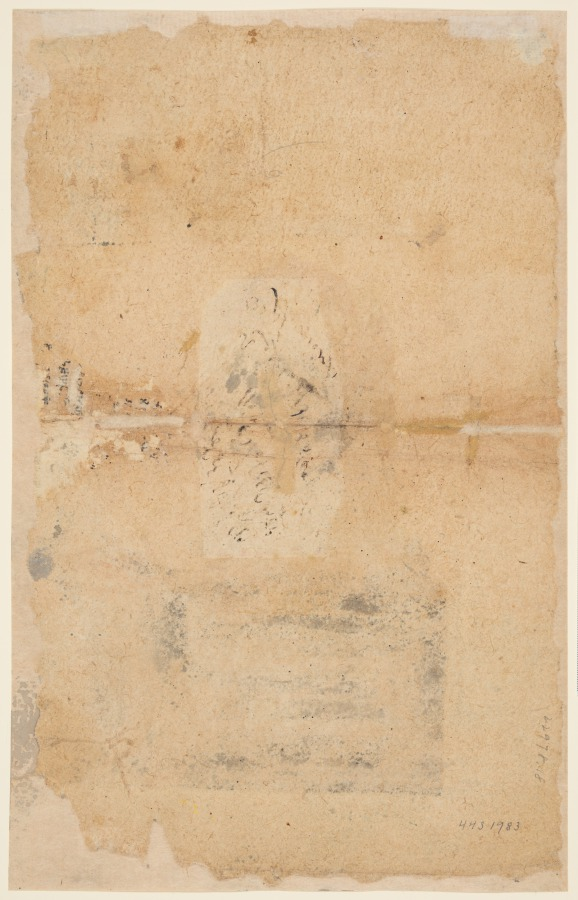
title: Stone sculptures in a Shiva temple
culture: Northern India, Pahari kingdoms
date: c. 1710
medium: gum tempera and ink on paper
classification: Painting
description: Viewers see a temple sanctum, the innermost and holiest part of a temple, from the point of view of the artist standing in front of the doorway. On a pedestal is a stone carving of the Hindu god Shiva on his mount, the bull Nandi. His wife, the goddess Parvati, sits on a lotus above his folded knee. The flowers, textiles, and devotional pigments are traces of ardent religious activity. At the right is an abstract cylindrical sculpture denoting the formless essence of Shiva, known as a linga. The tridents in front of the linga’s pedestal were placed by devotees whose wishes came true after visiting the temple.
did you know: An image of Ganesha can be seen on the left wall of the sanctum sanctorum.